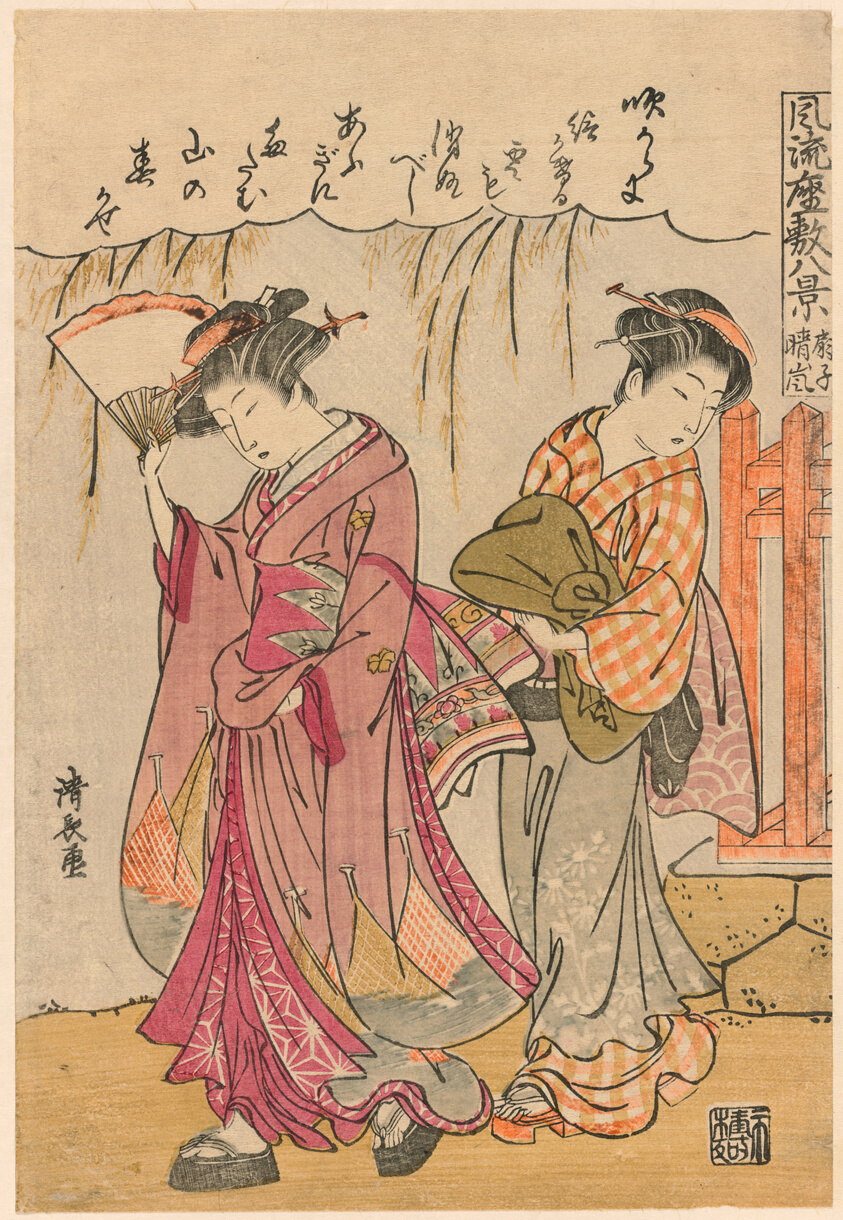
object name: Print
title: A Fan Suggesting a Dispersed Storm (Sensu no seiran) from the series "Eight Fashionable Scenes of the Parlor (Furyu zashiki hakkei)"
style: Japanese (culture or style)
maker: Torii Kiyonaga (Japanese, 1752-1815)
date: c. 1777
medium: Color woodblock print; koban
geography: Japan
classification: woodblock print; print; asian art